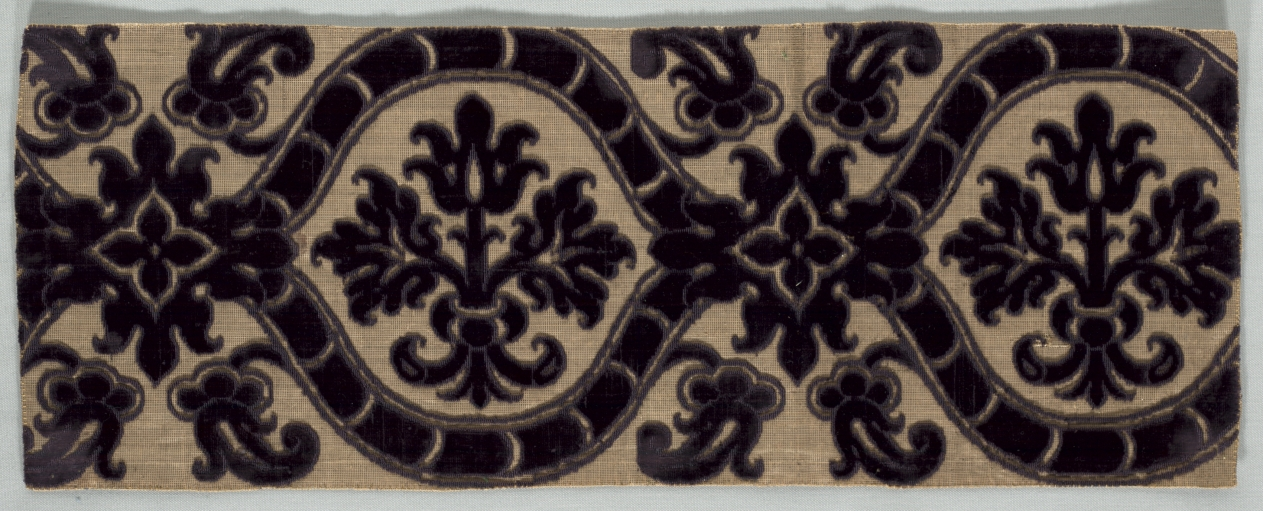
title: Velvet Brocade Textile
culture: Italy, late 16th century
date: late 1500s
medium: velvet (brocaded); silk and metal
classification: Velvet